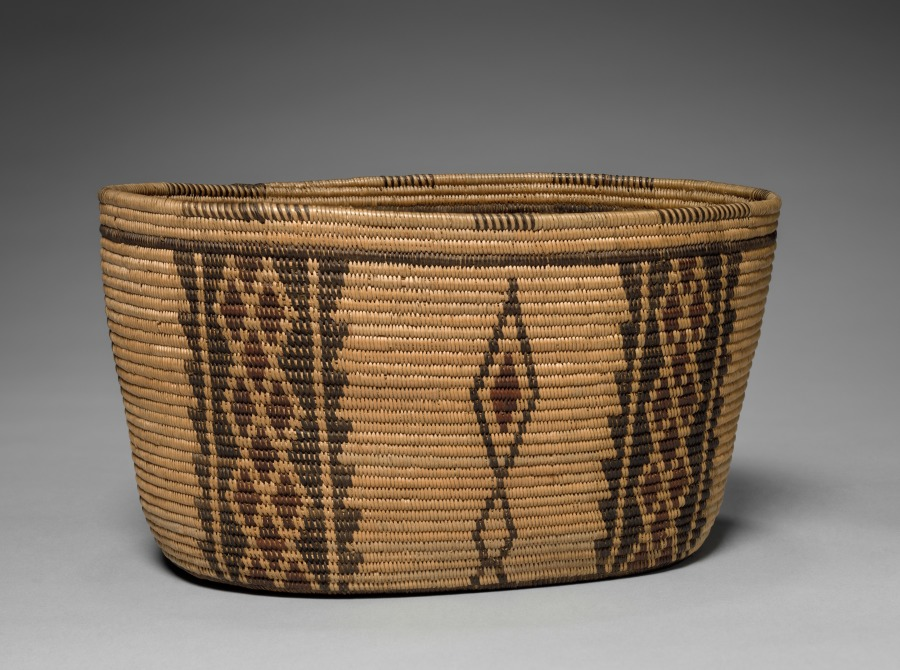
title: Bowl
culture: Great Basin, Timbisha Shoshone (Panamint)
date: c 1900–1910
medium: willow, devil's claw, yucca root; coiled (3 rods)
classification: Basketry